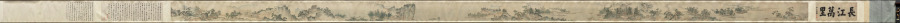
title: Ten Thousand Li of the Yangzi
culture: China, Ming dynasty (1368–1644)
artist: Dai Jin (Chinese, 1388–1462)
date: c. 1400s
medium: Handscroll; ink and color on paper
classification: Painting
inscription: Two colophons at end. Artist's seals: Dai Jin 戴進 and Wenjin 文進.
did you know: Dai Jin is traditionally considered the founder of the Zhe School, a style of landscape painting.